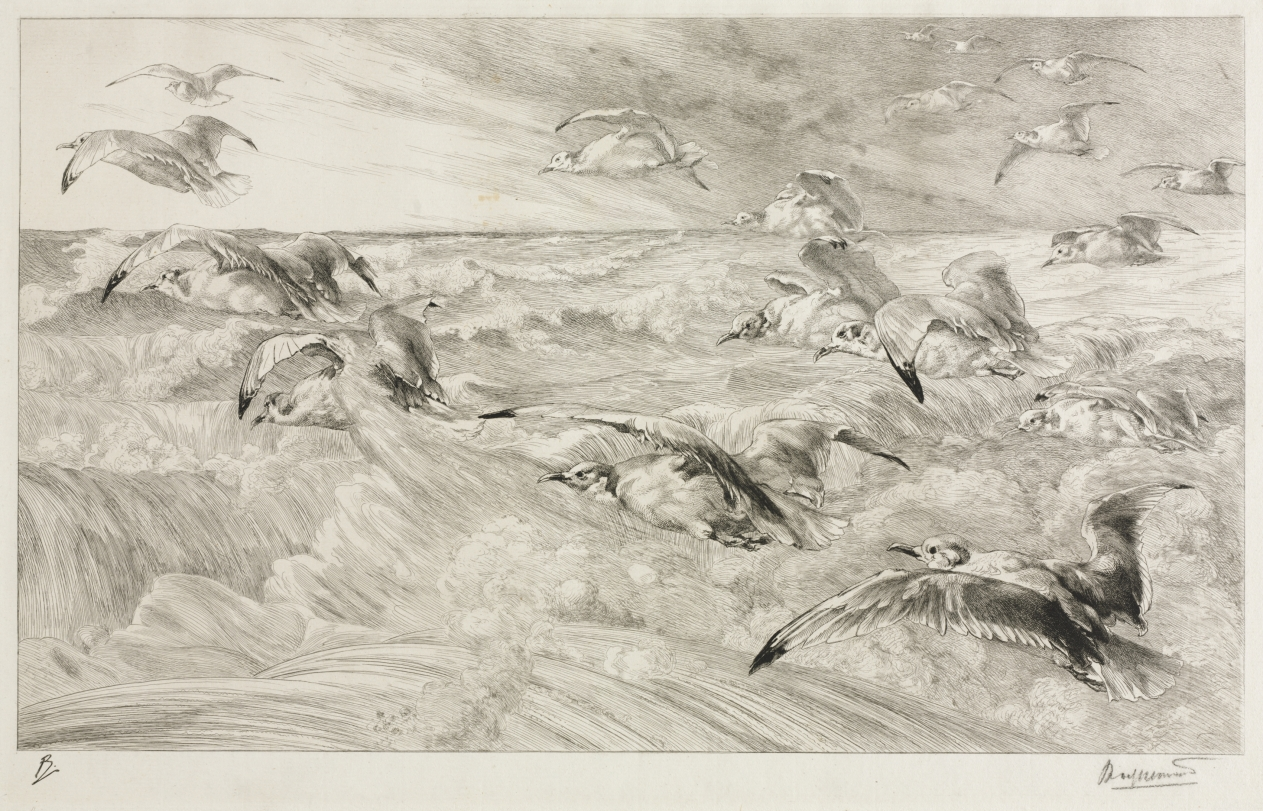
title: The Seagulls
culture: France, 19th century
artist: Félix Bracquemond (French, 1833–1914)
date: c. 1880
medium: etching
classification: Print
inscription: signed, lower right, in graphite: Bracquemond; lower left; in plate: B.